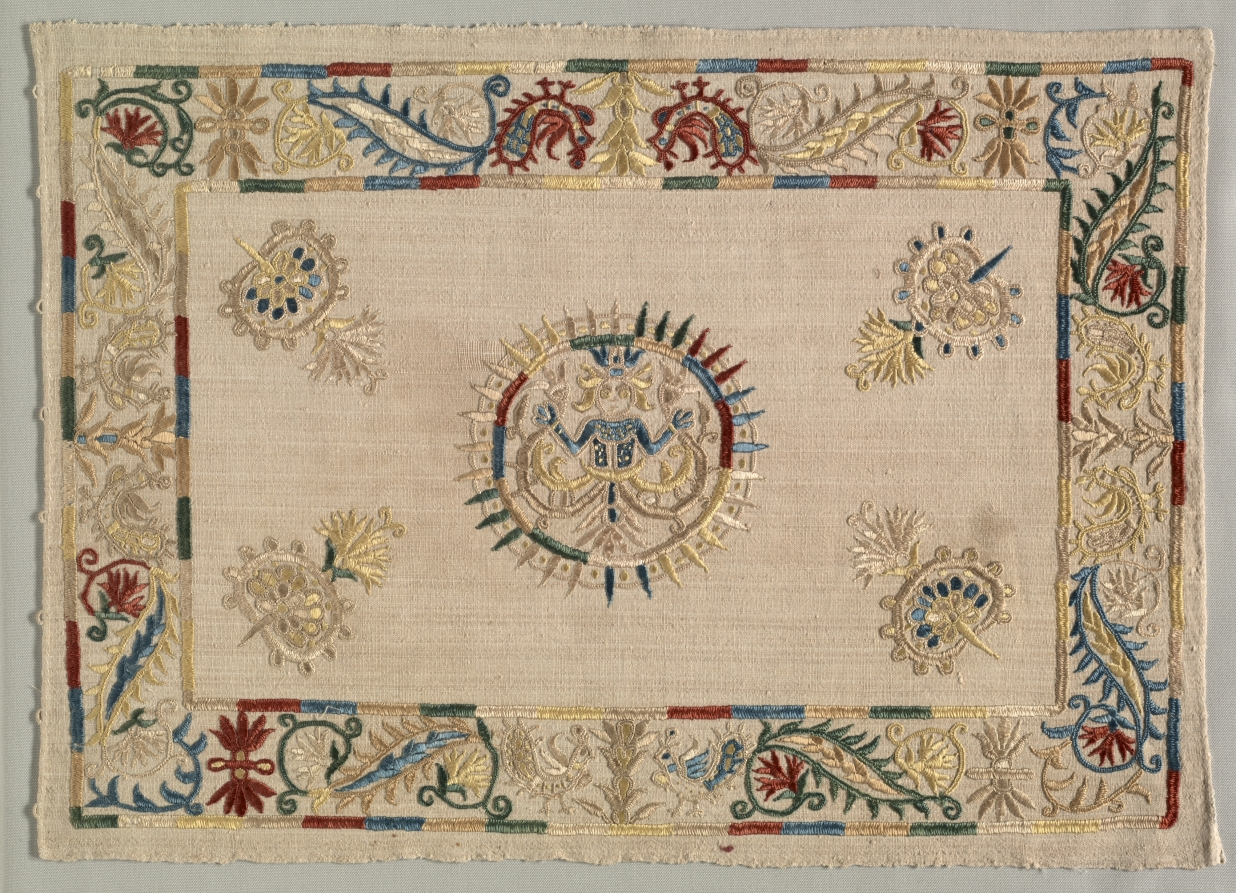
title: Pillow Cover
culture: Greece, Crete, 17th-18th century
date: 1600s - 1700s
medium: embroidery: silk on linen tabby ground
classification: Embroidery